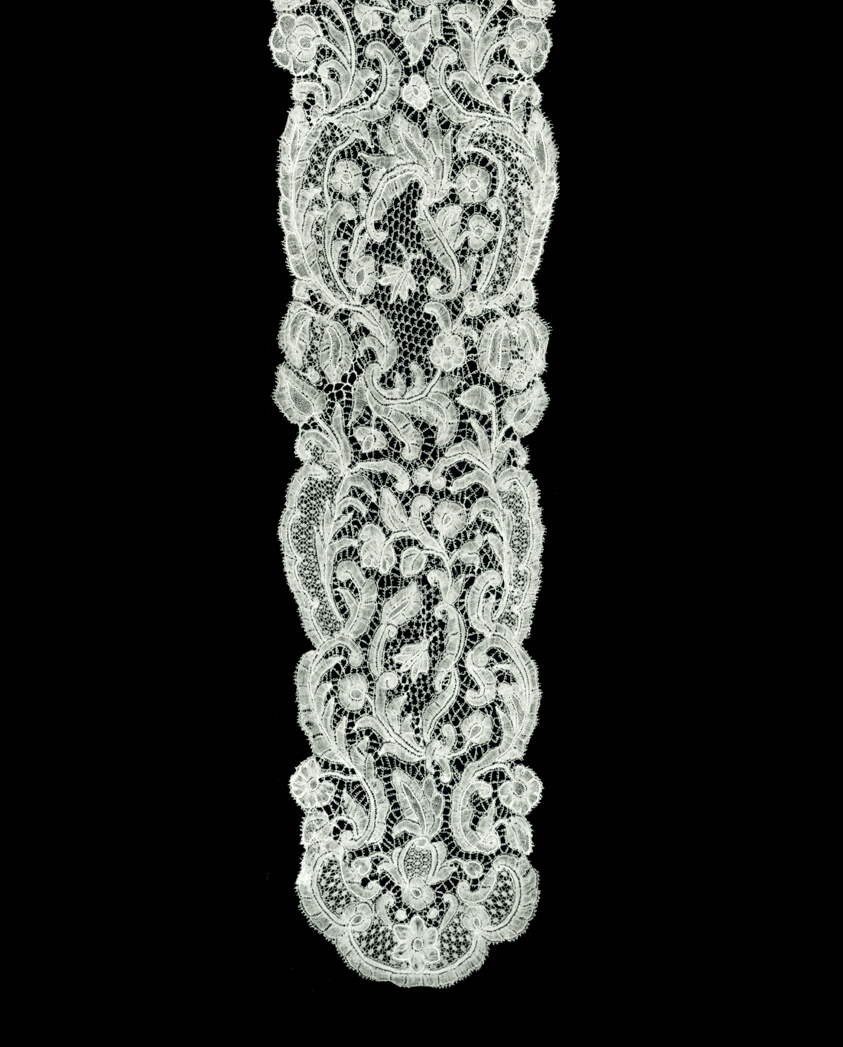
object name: Costume and Accessories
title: Pair of Lappets (Joined)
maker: Belgium, Flanders, Brussels or England, West Country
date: 1750s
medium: Linen, bobbin part lace of a type known as "Brussels" with a plaited bar ground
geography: Flanders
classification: costume accessory; lace - bobbin; textile; costume; costume accessory - headdress; costume accessory worn above the waist